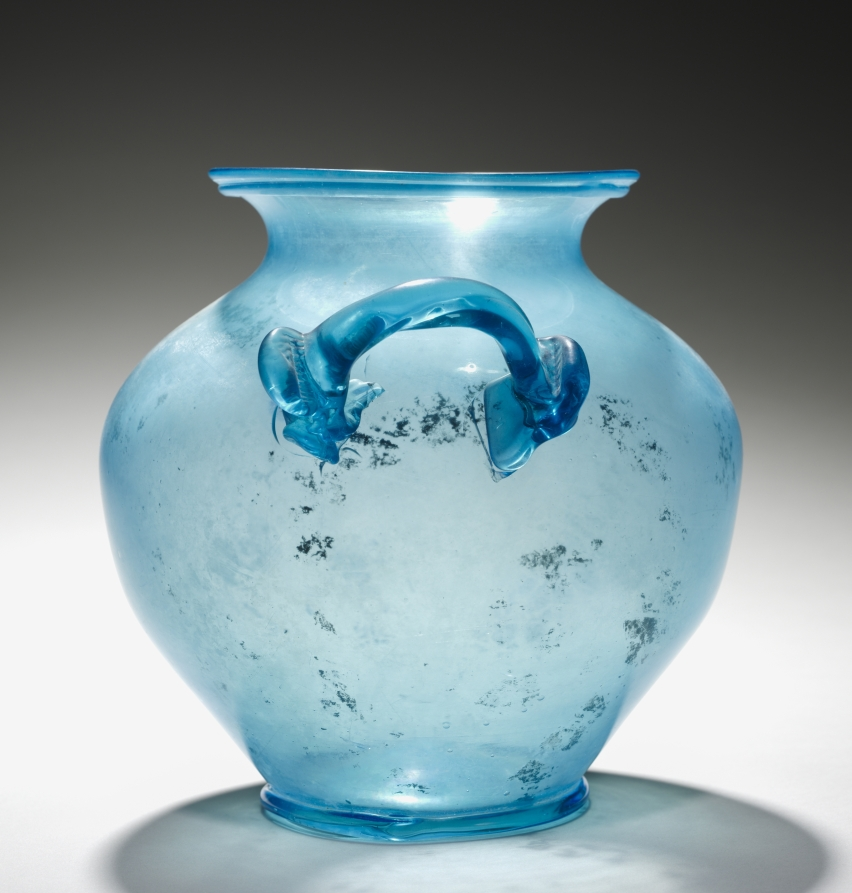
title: Cinerary Urn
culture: Italy, Roman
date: 1–200 CE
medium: glass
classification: Glass